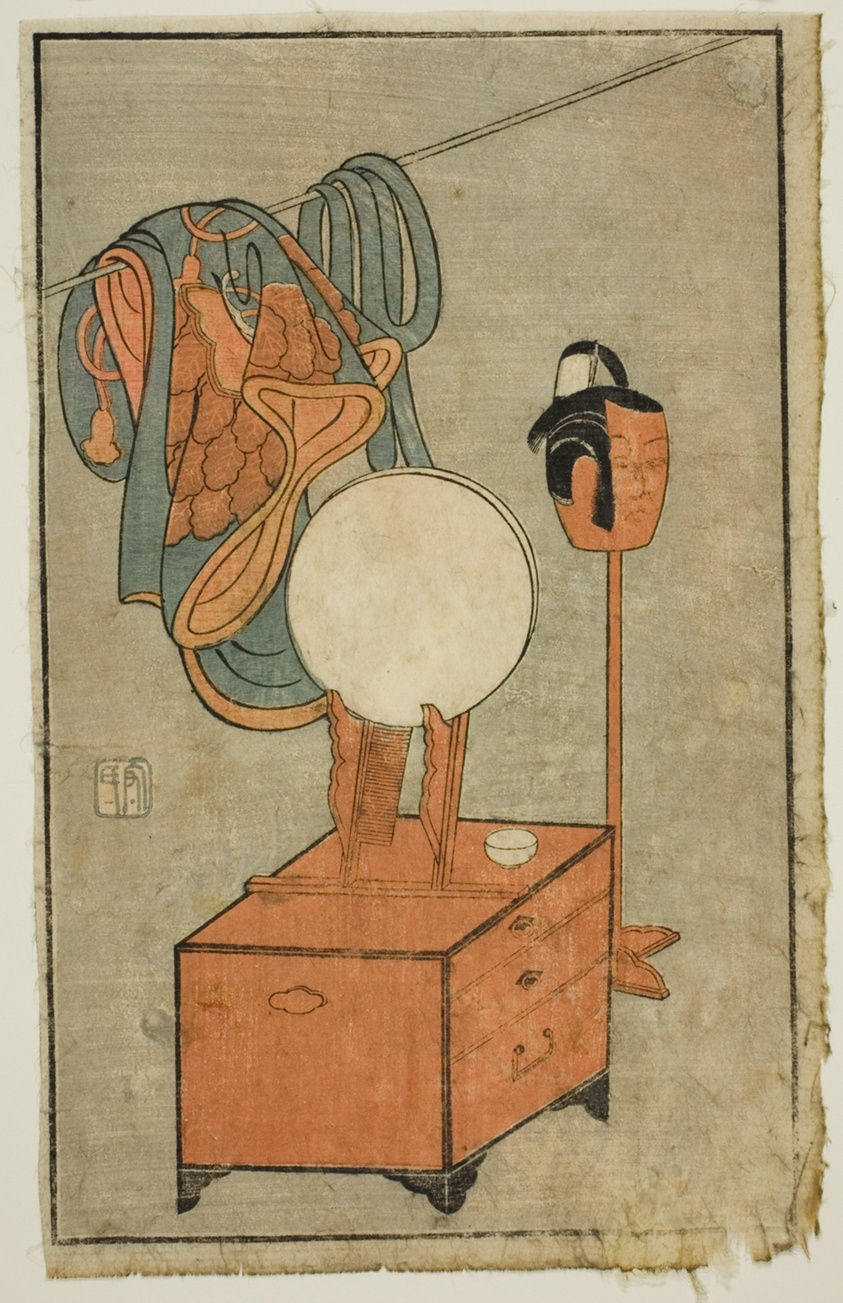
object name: Print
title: Actor's dressing table, from "A Picture Book of Stage Fans (Ehon butai ogi)"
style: Japanese (culture or style)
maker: Ippitsusai Buncho (Japanese, active c. 1755-90)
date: 1770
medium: Color woodblock print; page from illustrated book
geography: Japan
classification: woodblock print; print; asian art